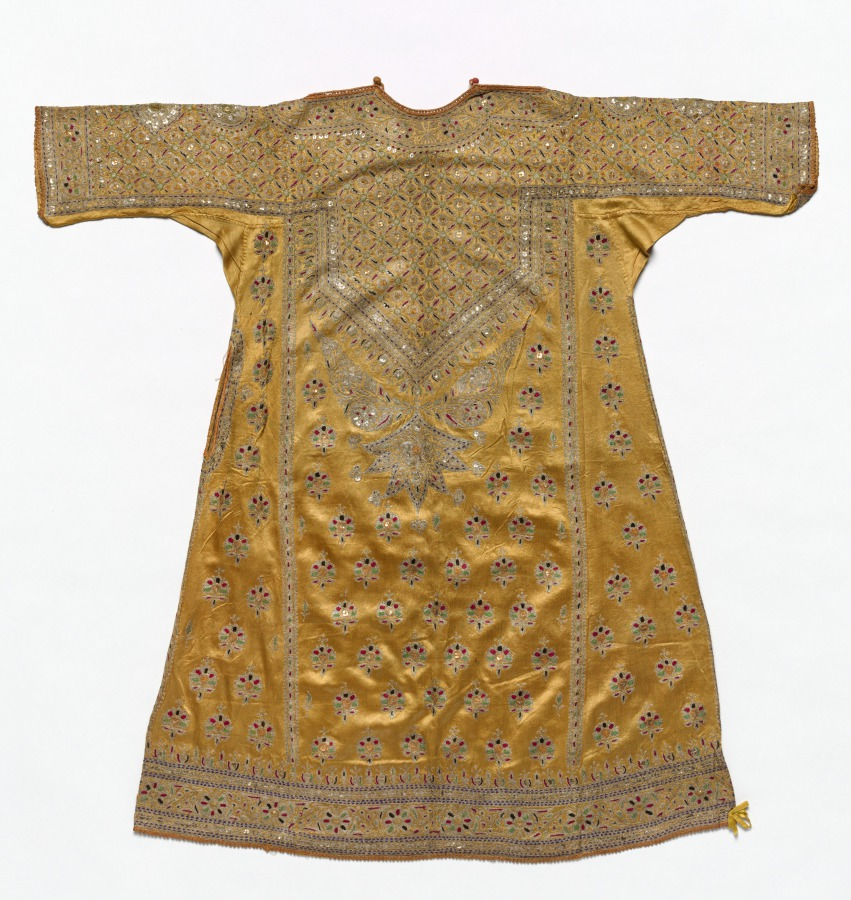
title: Woman's Blouse (Pairan)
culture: Western India, Gujarat, Kachchh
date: 1800s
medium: Silk thread on silk ground, embroidery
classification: Garment